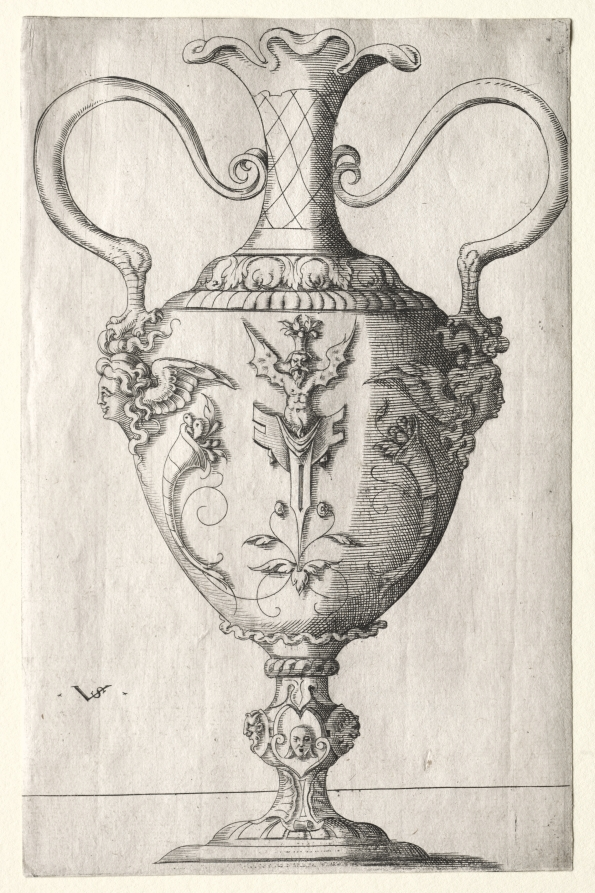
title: Design for a Vase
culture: Germany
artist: Virgil Solis (German, 1514–1562)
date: mid-1500s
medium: engraving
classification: Print